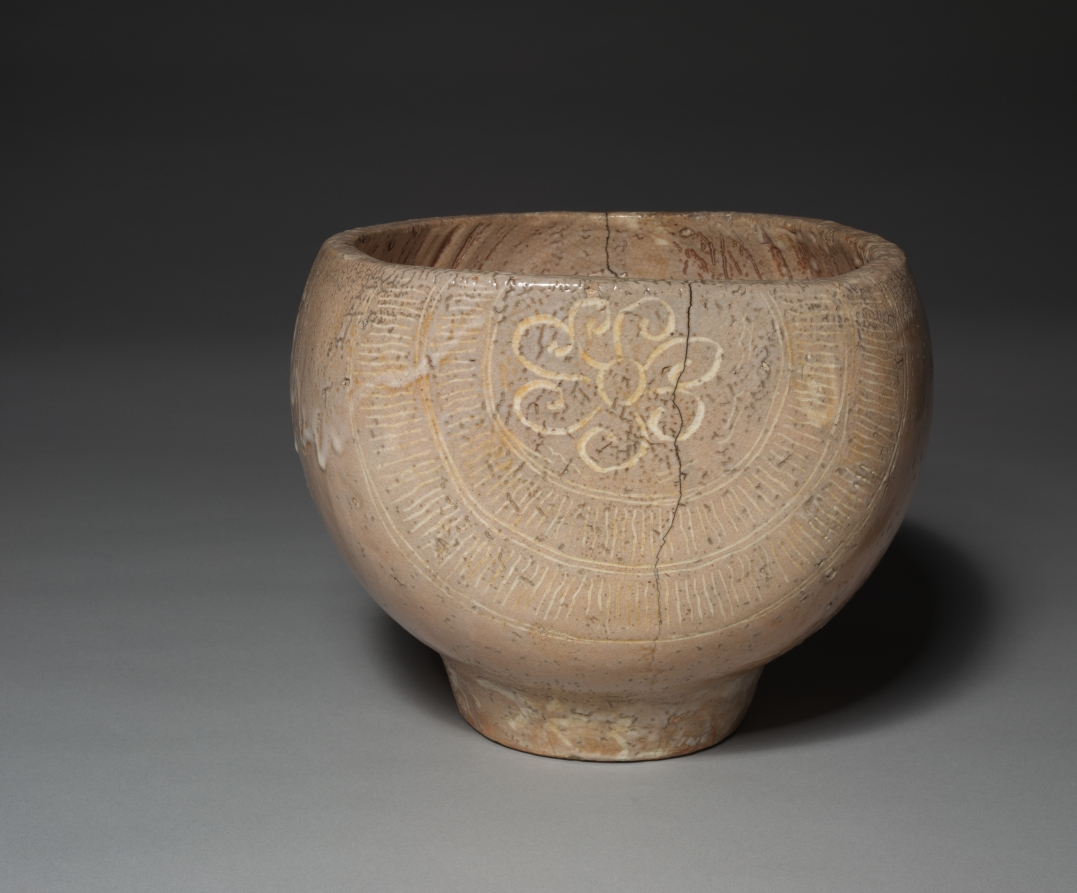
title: Baptismal Bowl with Christian Design of Cross and Insignia of the Society of Jesus: Hagi Ware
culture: Japan, Momoyama period (1573–1615)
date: c. 1600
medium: glazed stoneware, Waridawara type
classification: Ceramic